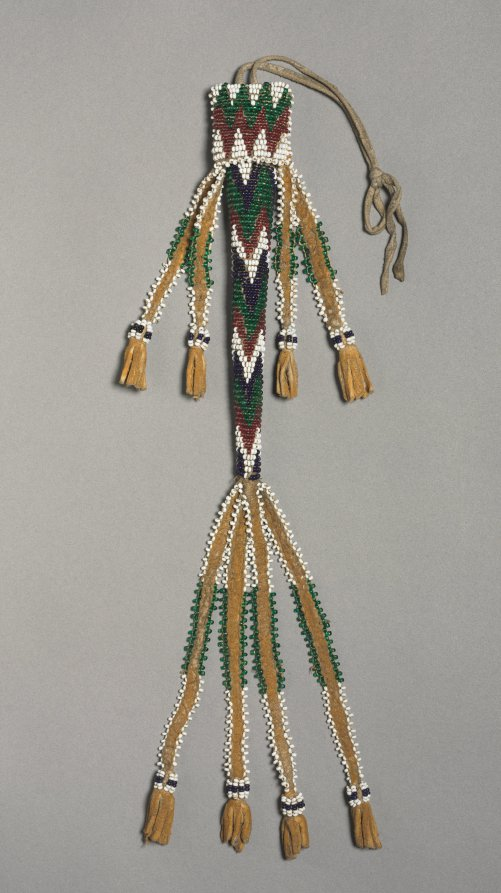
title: Awl Case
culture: Native North America, Plains, Gaigwu (Kiowa)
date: c. 1890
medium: Native-tanned hide, glass beads, cotton thread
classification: Leather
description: Plains women hung small bags often decorated with beads from their belts to keep their most important tools at hand. This one contained an awl, a shaft of bone, stone, or metal that tapered to a point and had many functions. One of the most important was to sew animal hides into garments: the awl was used to punch small holes in the hide, and then a thread made of animal sinew was laced through the holes and pulled tight.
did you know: Plains women hung small bags often decorated with beads from their belts to keep their most important tools at hand.